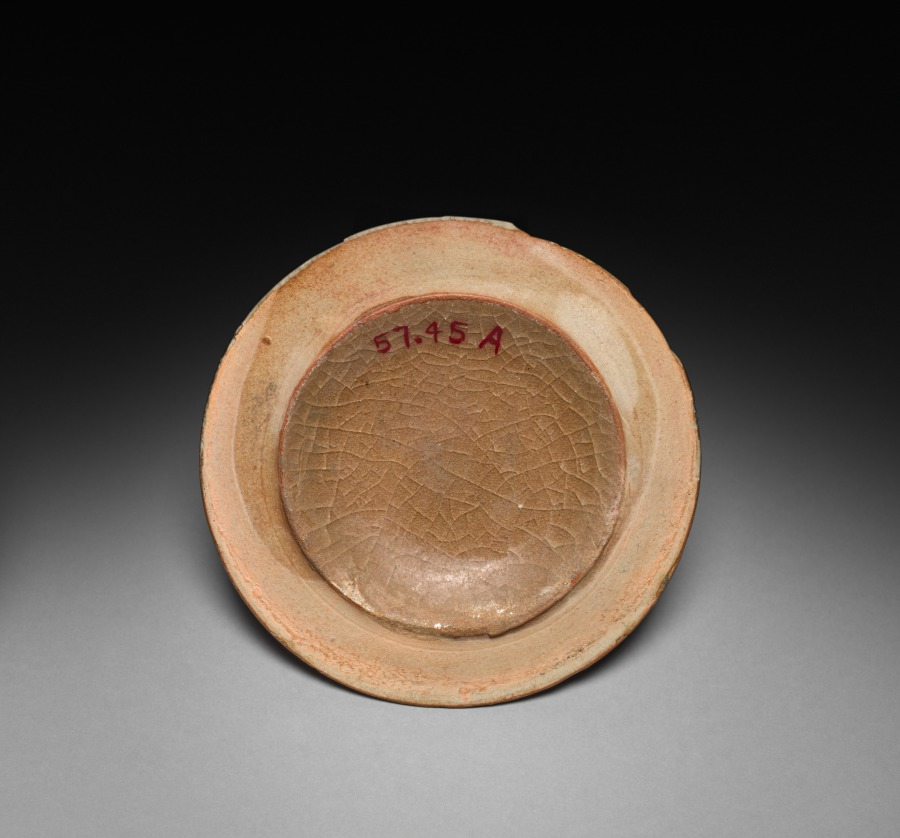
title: Covered Flat Jar (lid)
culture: China, Hangzhou, Suburban Altar Kiln, Southern Song dynasty (1127-1279)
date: 1127–1279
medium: glazed buff stoneware, Guan ware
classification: Ceramic